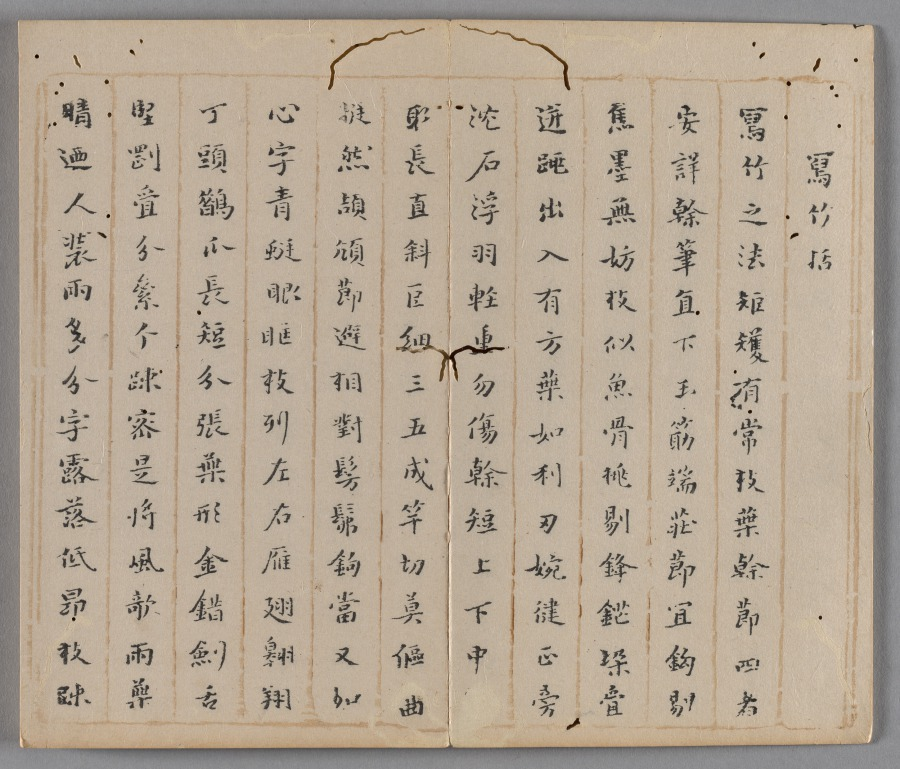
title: Ten Bamboo Studio Painting and Calligraphy Handbook (Shizhuzhai shuhua pu): Bamboo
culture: China, Qing dynasty (1644-1911)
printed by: Hu Zhengyan (Chinese, c. 1584–1674)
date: 1633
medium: Woodblock-printed book; ink and colors on paper; first edition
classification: Print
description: Color printing reached a level of perfection in the early 1600s, as seen in this Ten Bamboo Studio Collection of Calligraphy and Painting and the Mustard Seed Garden Manual of Painting (printed 1679 and 1701). The painterly quality, precision in registering (aligning) the woodblocks, and harmonious colors made them the most successful color print editions in Chinese history. Both editions were printed and compiled in Nanjing, spread nationwide, and had a great impact on the arts in Japan and Korea.